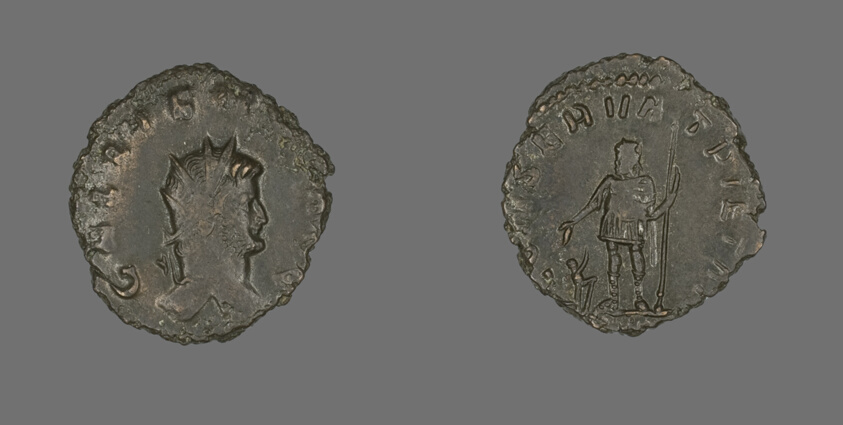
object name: Coin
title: Antoninianus (Coin) Portraying Emperor Gallienus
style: roman (ancient, style or period)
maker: Roman, minted in Rome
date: 260-268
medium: Silver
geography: Roman Empire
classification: coin; ancient art